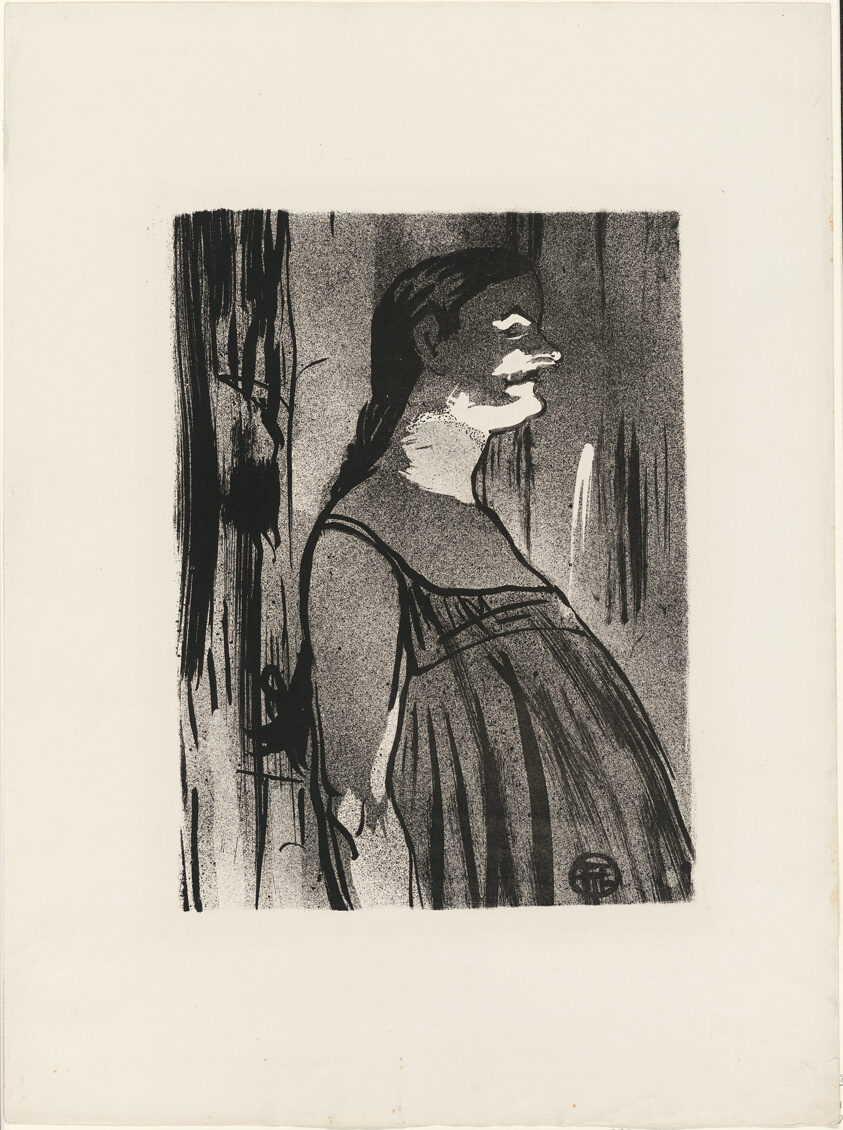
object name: Print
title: Madame Abdala, from Le Café-Concert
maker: Henri de Toulouse-Lautrec (French, 1864-1901); printed by Edward Ancourt & Cie (French, 19th-20th c.); published by L'Estampe originale (French, 1893-1895)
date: 1893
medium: Lithograph on ivory wove paper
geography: France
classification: lithograph; print; prints and drawing